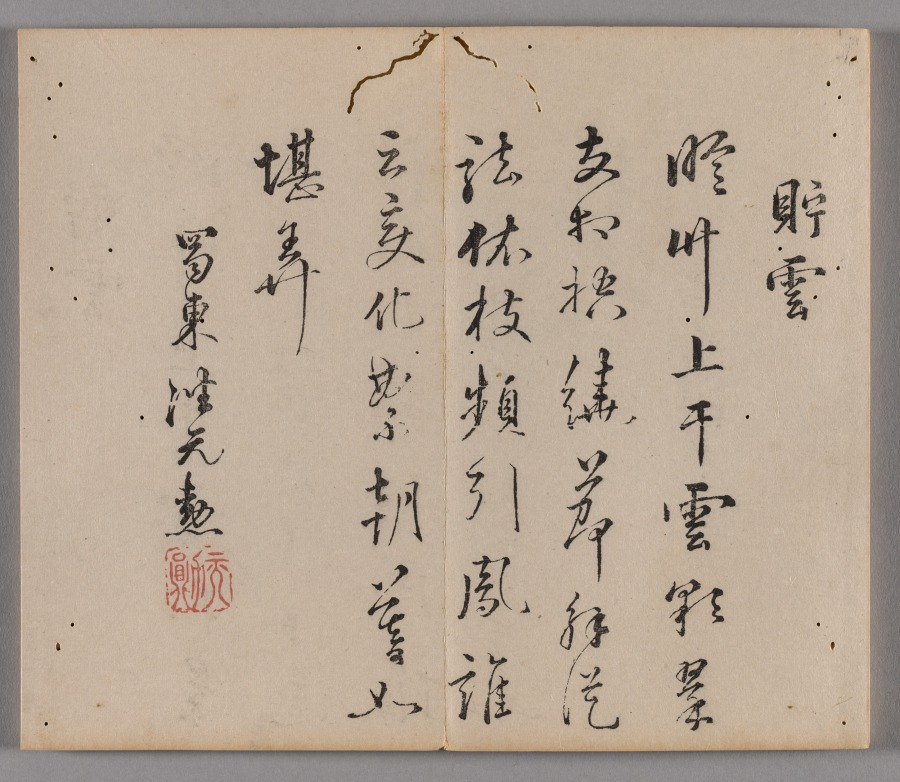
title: Ten Bamboo Studio Painting and Calligraphy Handbook (Shizhuzhai shuhua pu): Bamboo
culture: China, Qing dynasty (1644-1911)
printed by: Hu Zhengyan (Chinese, c. 1584–1674)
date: 1633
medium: Woodblock-printed book; ink and colors on paper; first edition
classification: Print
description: Color printing reached a level of perfection in the early 1600s, as seen in this Ten Bamboo Studio Collection of Calligraphy and Painting and the Mustard Seed Garden Manual of Painting (printed 1679 and 1701). The painterly quality, precision in registering (aligning) the woodblocks, and harmonious colors made them the most successful color print editions in Chinese history. Both editions were printed and compiled in Nanjing, spread nationwide, and had a great impact on the arts in Japan and Korea.